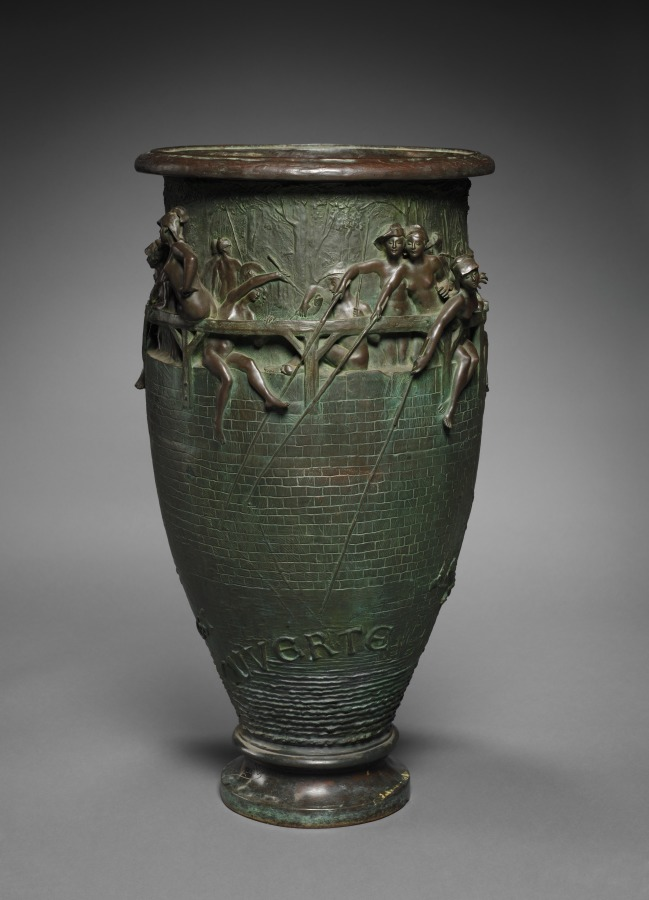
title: Vase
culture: France, 19th century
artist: Gustave-Joseph Chéret (French, 1838–1894)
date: c. 1890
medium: bronze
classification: Sculpture